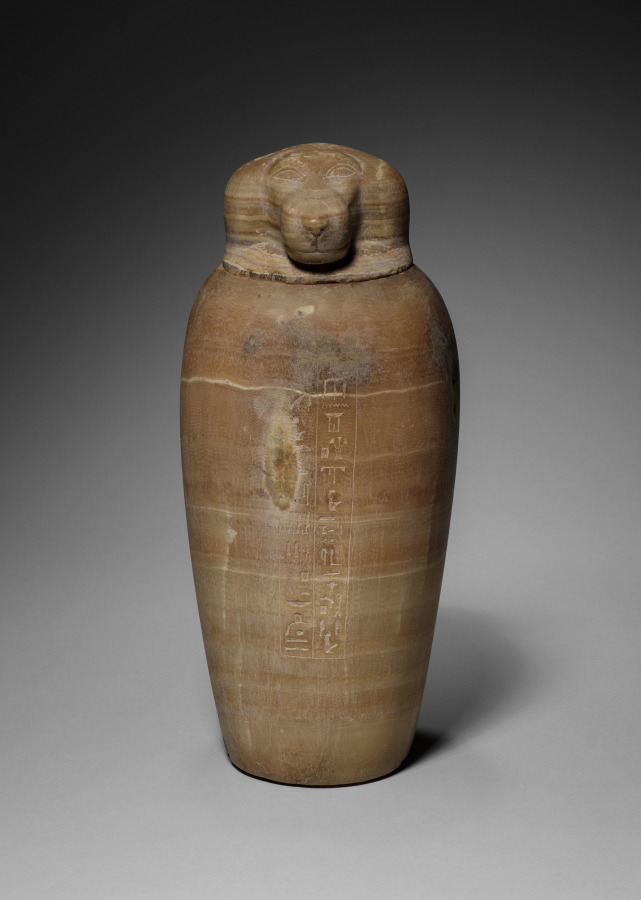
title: Canopic Jar with Baboon's Head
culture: Egypt, Late period (715–332 BCE), Dynasty 26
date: 664–525 BCE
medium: travertine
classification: Funerary Equipment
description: In the process of mummification, the liver, lungs, stomach, and intestines were removed, separately embalmed, and stored in specialized jars known as canopic jars (after a sailor in Greek mythology, who died at the town of Canopus in the Nile Delta and was worshipped there in the form of a human-headed jar). Each organ was identified with one of four funerary deities collectively known as the Sons of Horus: the liver with Imsety (man's head), the lungs with Hapy (baboon's head), the stomach with Duamutef (jackal's head), and the intestines with Qebehsenuef (falcon's head). It was their duty to protect the deceased and restore to him his body parts in the hereafter.